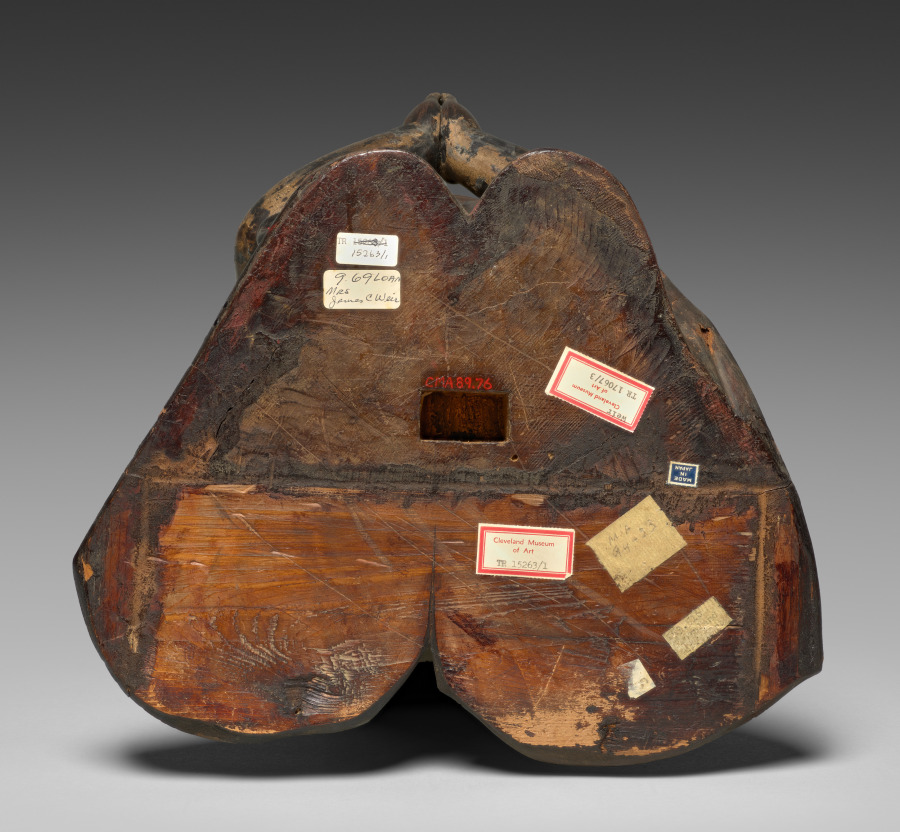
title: Prince Shōtoku at Age Two (Shōtoku Taishi)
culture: Japan, Kamakura period (1185–1333)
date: early 1300s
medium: Wood with lacquer, color, and rock-crystal inlaid eyes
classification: Sculpture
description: Two-year old Prince Shōtoku (573?–622?) places his palms together in a gesture called gasshō. Shōtoku played a major role in the introduction of Buddhism to Japan, and devotees of the prince commissioned painted and sculpted images commemorating important moments of his life. At age two, the prince faced east and chanted the name of the Buddha without having been taught the practice. This sculpture captures the fantastic event foreshadowing his future acts.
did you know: Shōtoku Taishi had several titles. One translates to "the prince of the stable door" because he was said to have been born in the imperial stables.